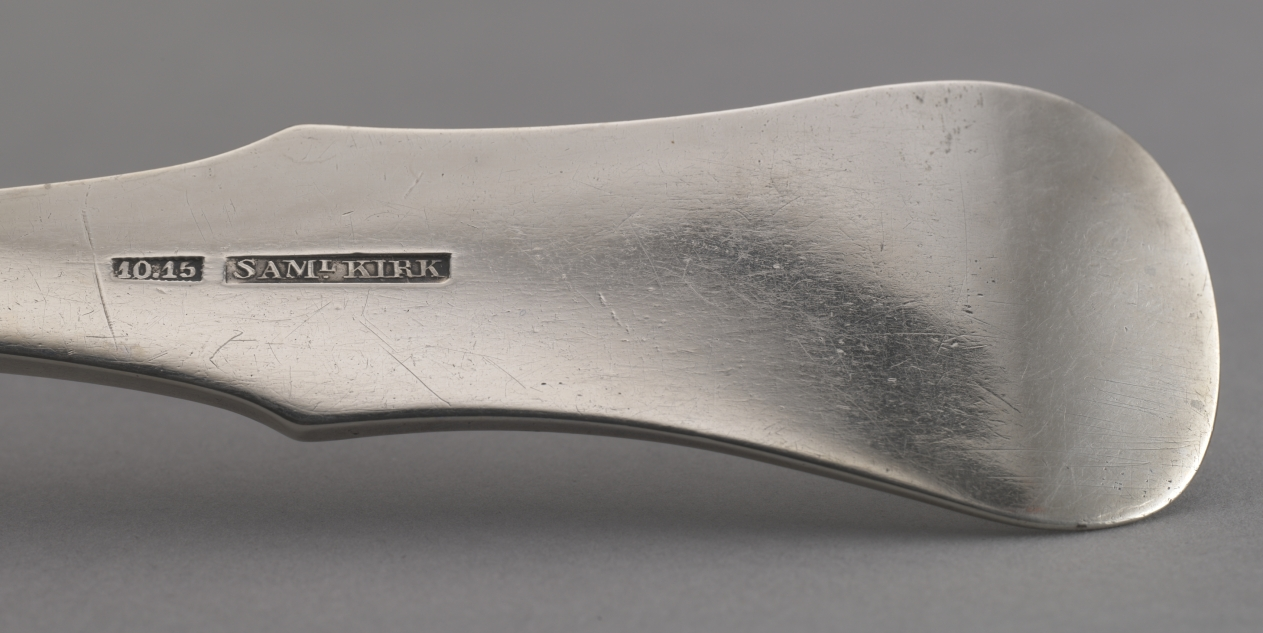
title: Fish Slice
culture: America, Maryland, Baltimore, 19th century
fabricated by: Samuel Kirk (American, 1793–1872)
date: c. 1824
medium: silver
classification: Silver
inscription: engraved: "Ellen Forsyth 1824" in script along top of handle end.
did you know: Look closely at the delicate details of this utensil. Often the decoration reveals the function of these special pieces. For what purpose do you think this was used?